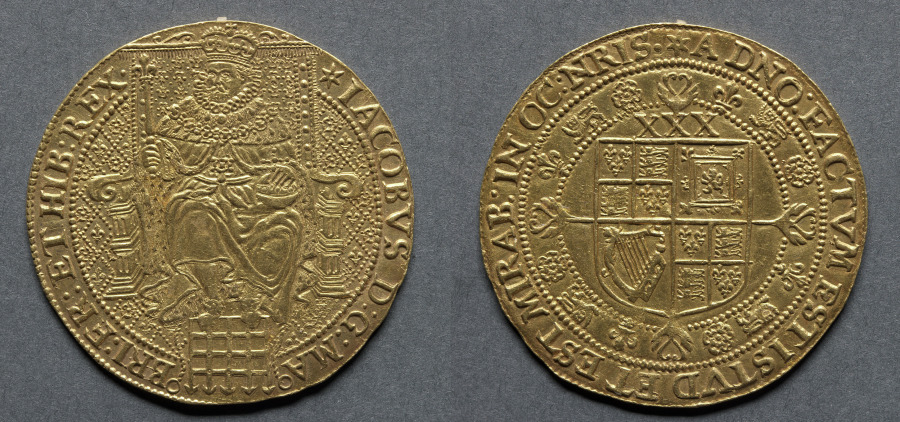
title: Rose Ryal: James I (obverse); Shield of Arms (reverse)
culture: England, James I, 1603-1625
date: 1619–20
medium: gold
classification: Coins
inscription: IACOBUS DG MA BRI FR ET HI REX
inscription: A. DNO FACTUM EST ISTUD ET EST MIRAB IN OCULIS NRIS, XXX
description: This gold coin comes from the third period (1619–25) of coinage of King James I of England and features a crowned shield surrounded by roses and lions on the reverse. This is the last medieval design of the king enthroned, an excellent example of the fine designs that the ancient craftsmen managed to produce on hand-struck hammered coins.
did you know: A rose ryal is worth 30 shillings; you can see a roman numeral 30 on the reverse.